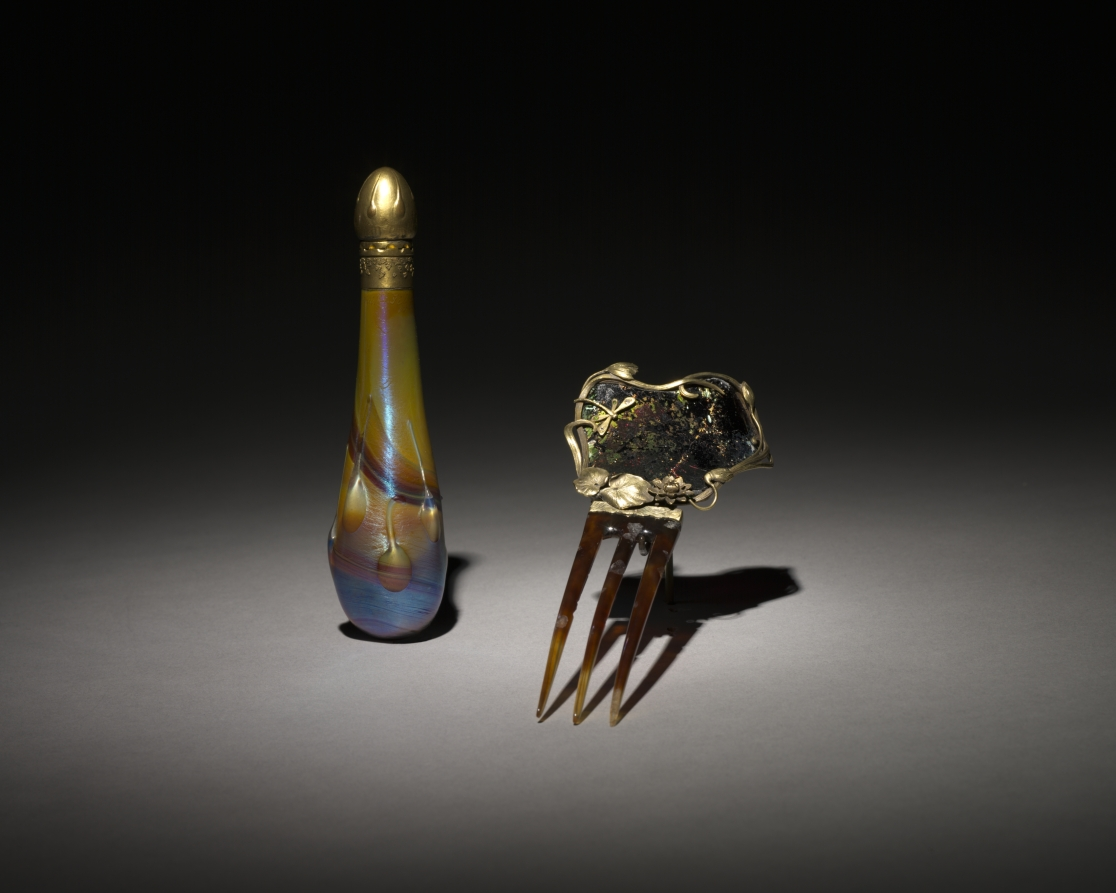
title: Perfume Bottle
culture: America, New York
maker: Tiffany Studios (United States, New York, 1902–32)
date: c. 1905–10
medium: Favrile glass with gilt metal cover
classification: Glass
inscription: inscribed at neck: Louis C. Tiffany °6837.